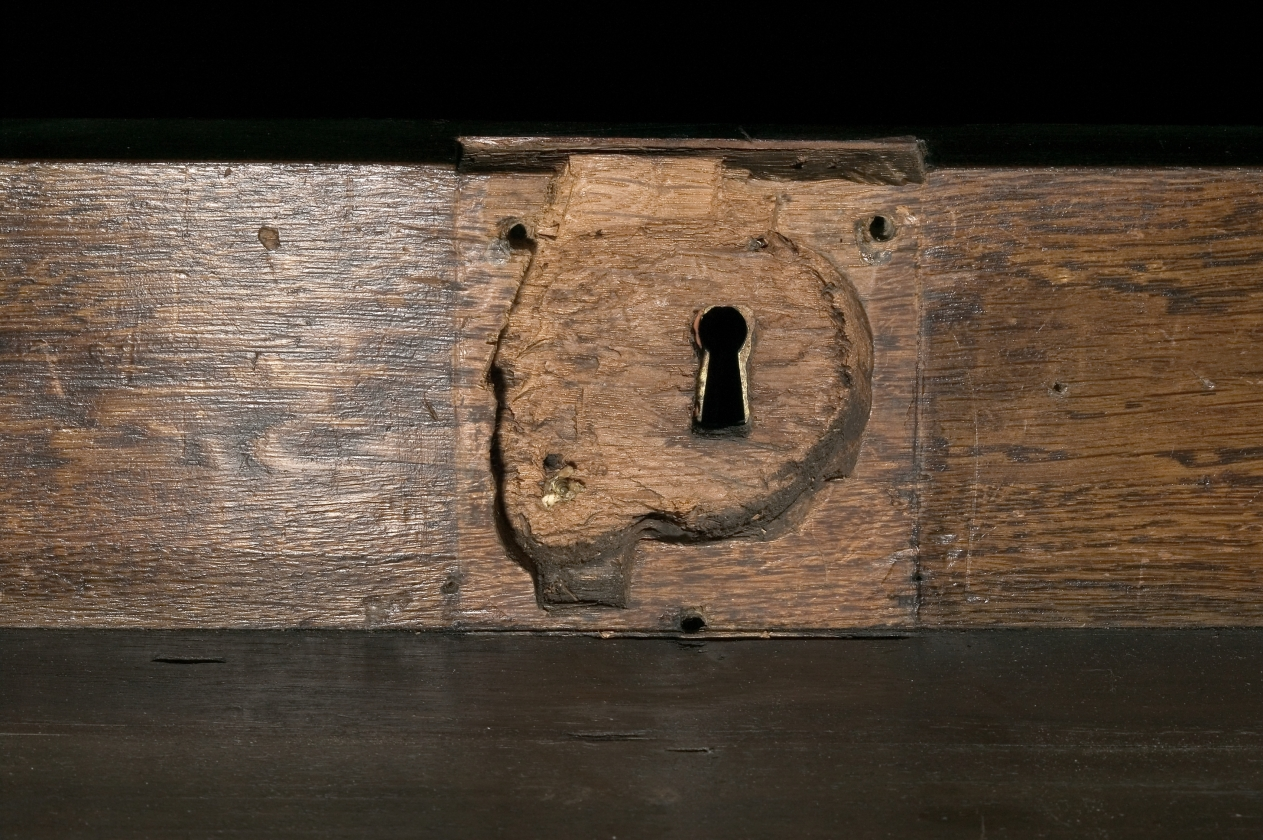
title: Table Desk (Bureau Plat)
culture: France, 18th century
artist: Bernard II van Riesen Burgh (Dutch, 1766)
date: c. 1750– 1760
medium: wood marquetry with gilt bronze mounts, leather top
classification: Furniture and woodwork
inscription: signed three times on bottom edge of apron: B. V. R. B.